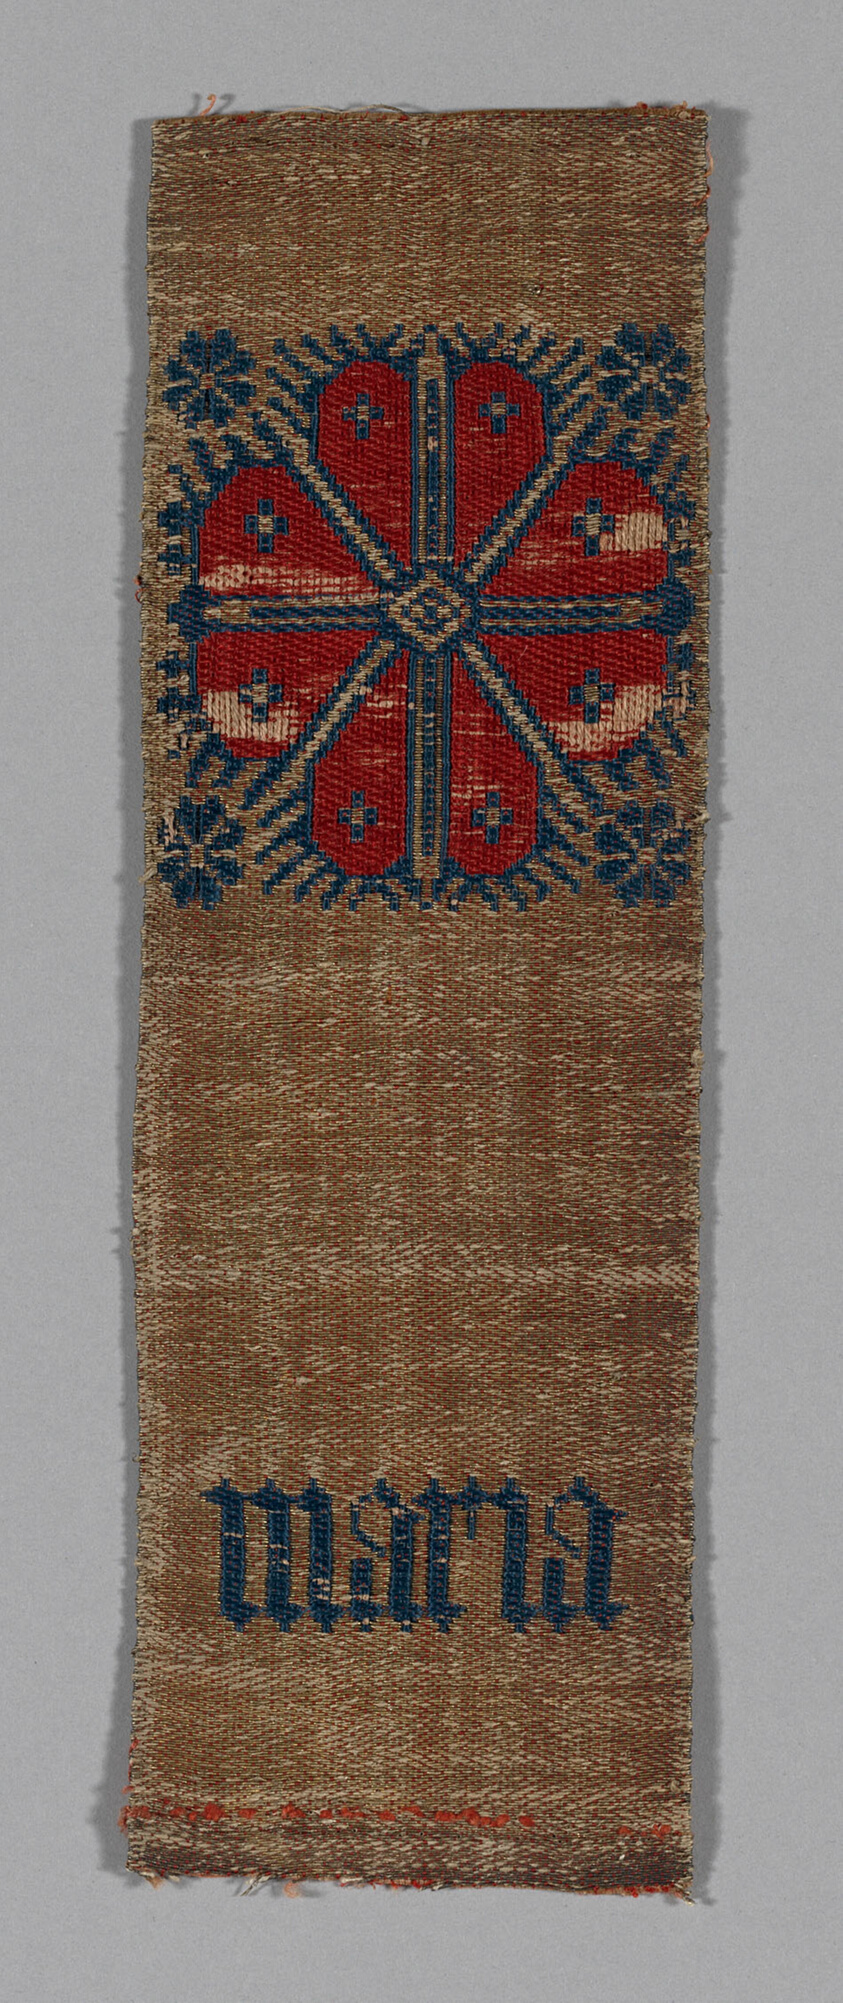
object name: Textile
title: Fragment (From an Orphrey Band)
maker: Germany, Cologne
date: 15th century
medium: Silk, linen, and gilt-animal-substrate-wrapped linen, bands of four color complementary weft, weft-float faced 1:2 'S' twill weave with inner warps and bands of complementary weft, weft-float faced 1:2 weft chevron twill weave with inner warps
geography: Cologne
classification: textile; weaving; liturgical